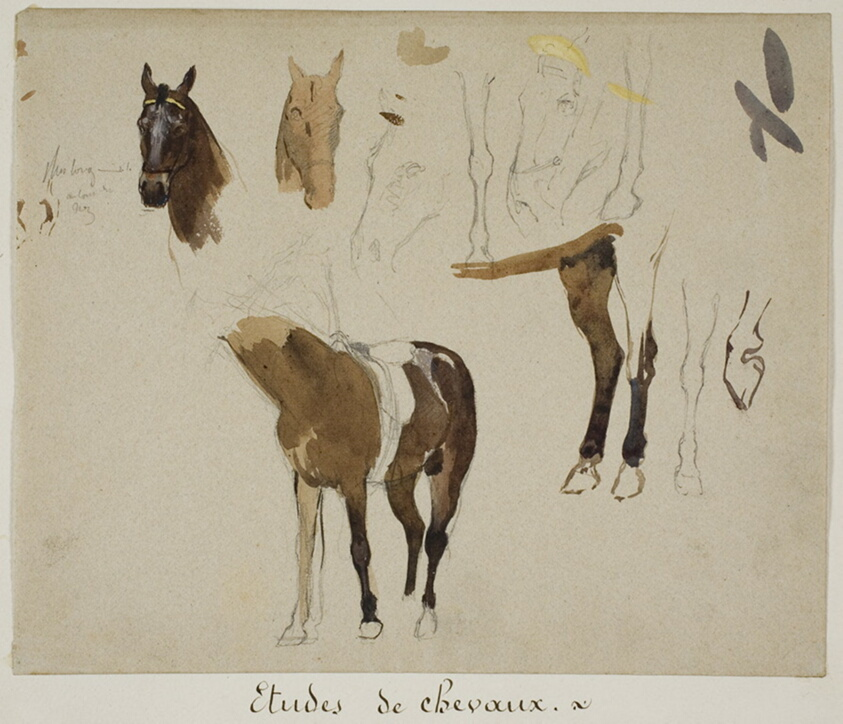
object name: Drawing and Watercolor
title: Studies of Horses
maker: Jules-Élie Delaunay (French, 1828-1891)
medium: Graphite, with ink wash and touches of gouache, on buff wove paper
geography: France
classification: graphite; drawings (visual works); prints and drawing